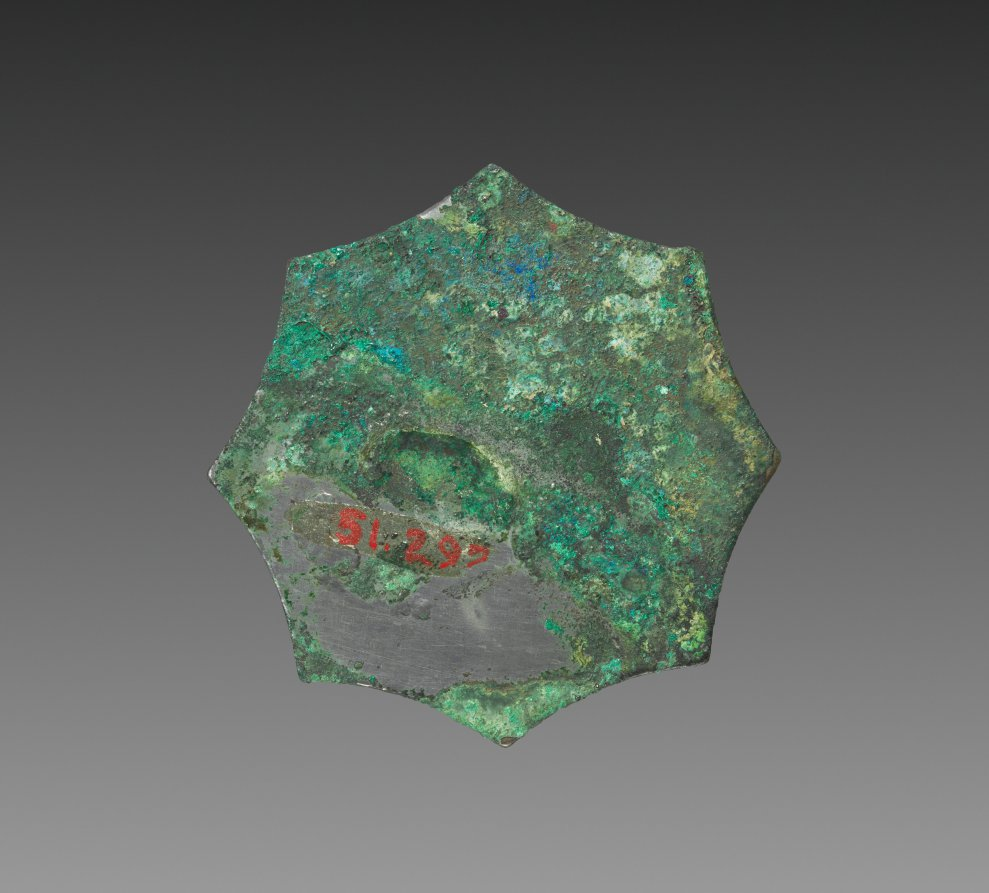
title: Mirror with Animals and Birds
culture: China, Tang dynasty (618-907)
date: early 700s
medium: bronze inset with gilded-silver relief decoration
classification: Metalwork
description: The silver inset of this mirror back was decorated with several hand-beaten techniques. High-relief birds, beasts, and foliage were hammered from the underside (repoussé) and finely chiseled on the front (chased). The background and border were punched with a metal stamp of tiny circles. Mirrors of this precious material, diminutive size, and starlike form number among the most refined products of Tang metalworkers. Some historians suggest that miniature mirrors were specifically designed as burial gifts for children, but Tang gold and silver cosmetic boxes of similar scale indicate that these objects were made to grace the dressing tables of elegant women.